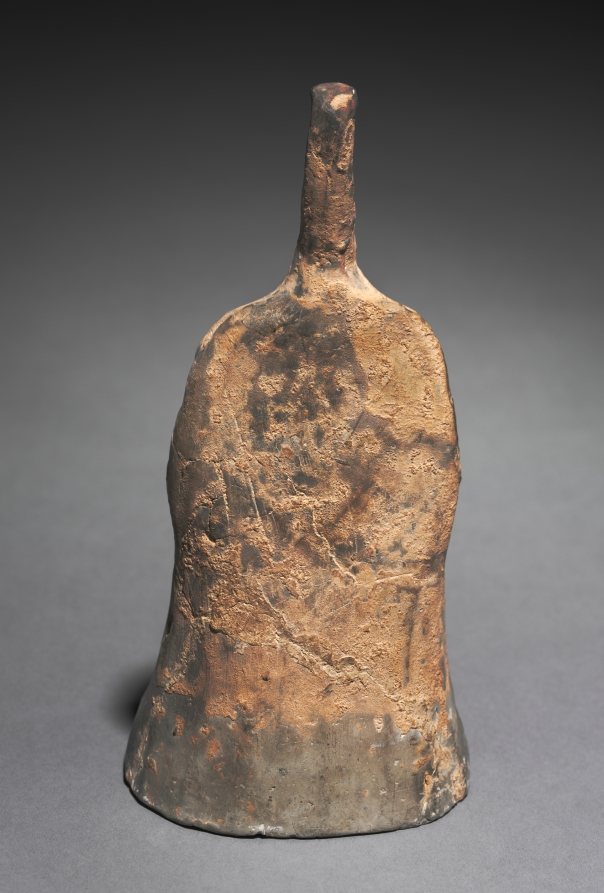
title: Mortuary Figure of the Zodiac Sign: Serpent (Virgo)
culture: China, Northern Wei dynasty (386-534)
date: 500s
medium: gray earthenware with traces of slip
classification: Sculpture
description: The twelve-animal zodiac series—rat, ox, tiger, rabbit, dragon, snake, horse, goat, monkey, rooster, dog, and boar—signifies a traditional Chinese concept of time structured in a cyclical order. The twelve animals are also linked to the art of fortunetelling that underlies human existence in connection with the changes of the universe. The use of the twelve zodiac animals as tomb furniture suggests they provided a cosmological structure for the afterlife.